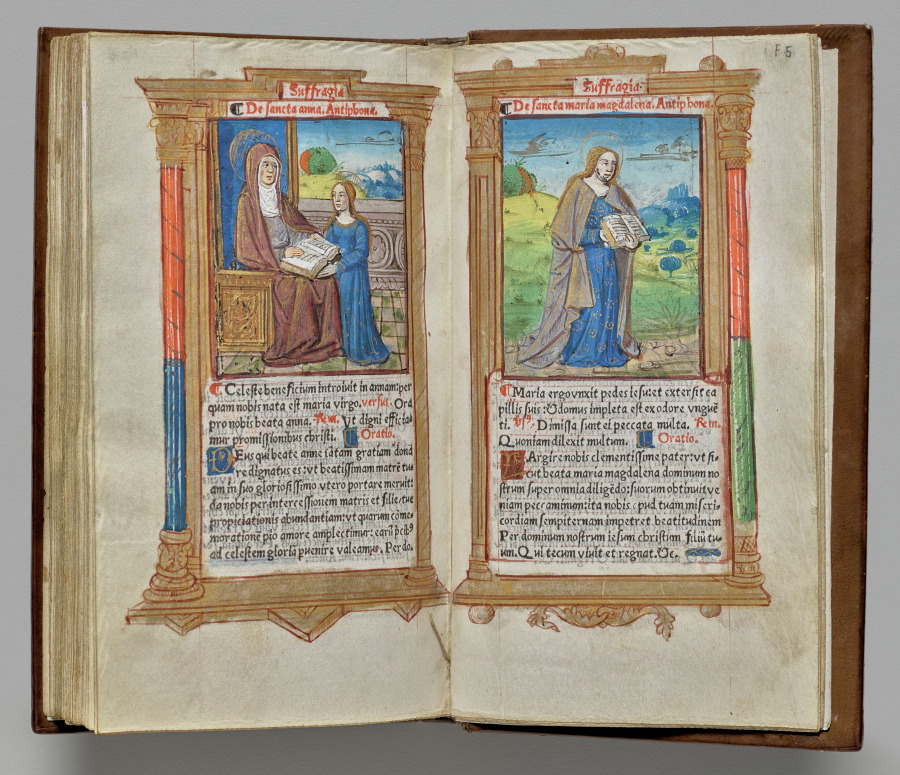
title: Printed Book of Hours (Use of Rome): fol. 109r, Mary Magdalene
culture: France, Paris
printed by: Guillaume Le Rouge (French, Paris, active 1493–1517)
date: 1510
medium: 112 printed folios on parchment, bound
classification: Bound Volume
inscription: Suffragia Ant: Maria ergo unxit pedes Iesu et extersit capillis suis: et domus impleta est ex odore unguenti. V: Dimissa sunt ei peccata multa. Ant: Maria ergo unxit pedes Iesu et extersit capillis suis: et domus impleta est ex odore unguenti. Oratio: Largire nobis clementissime pater quod sicut beata Maria Magdalena dominum nostrum Iesum Christum super omnia diligendo suorum obtinuit veniam peccaminum: ita nobis apud tuam misericordiam sempiternam impetret beatitudinem. Per eundem dominum nostrum Iesum Christum filium tuum. Qui tecum vivit et regnat in…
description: Printed books of hours were produced between 1485 and 1520. Significantly less expensive than handwritten production, printing made books of hours’ popularity soar. More than 1,775 different versions were printed during this time, allowing much customization. This hybrid version has printed text but hand-colored images and comes from Paris, a major center of book production. Open to the suffrages, indicated in red at the top, one page is devoted to Saint Anne and one to Mary Magdalene. Other versions of this book of hours have less color and attention to detail, indicating a higher price paid for this edition.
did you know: A typical book of hours contains around a dozen suffrages, also known as memorials, from the Latin memoriae.